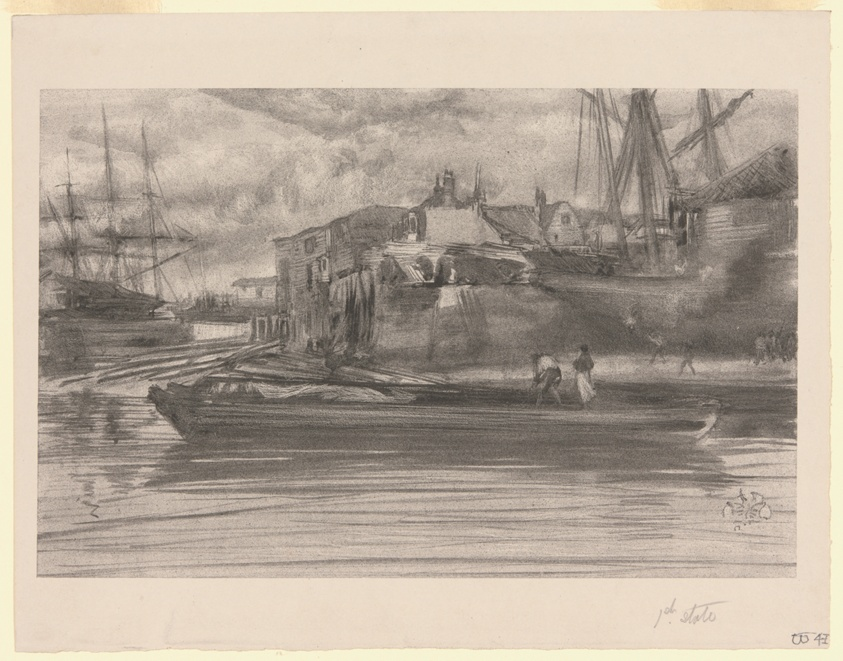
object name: Print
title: Limehouse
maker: James McNeill Whistler (American, 1834-1903)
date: 1878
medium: Lithotint, in black ink, with scraping and incising, on a prepared half-tint ground, on ivory plate paper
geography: United States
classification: lithotint; lithograph; print; prints and drawing; paper